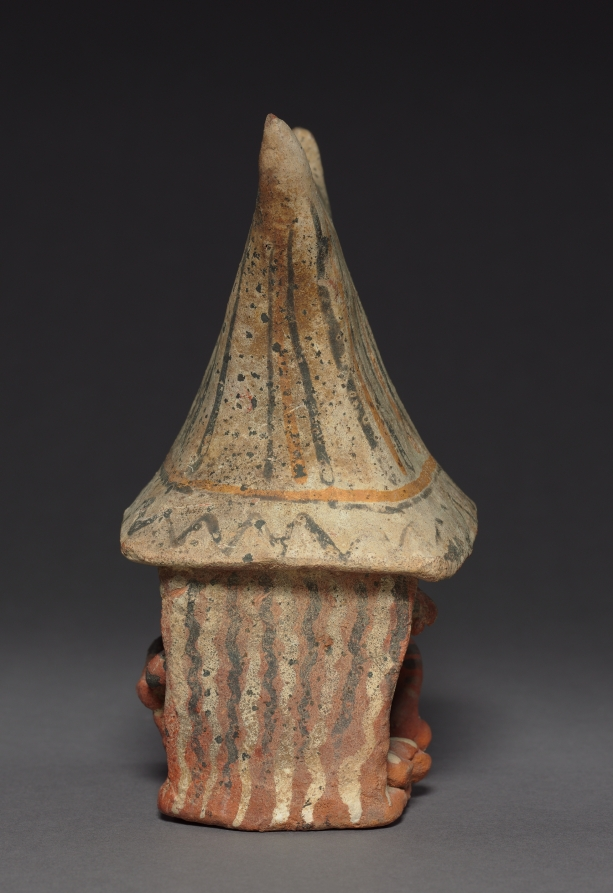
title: Architectural Scene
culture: Mesoamerica, West Mexico, Nayarit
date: 200 BCE–300 CE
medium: ceramic, pigment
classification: Sculpture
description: This scene, which shows several people inside a structure, is a compact version of larger, more elaborate examples. Like them, it could depict festivities held to commemorate one of life’s milestones, such as marriage or the coming of age.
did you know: This scene may depict festivities held to commemorate one of life’s milestones, such as marriage.